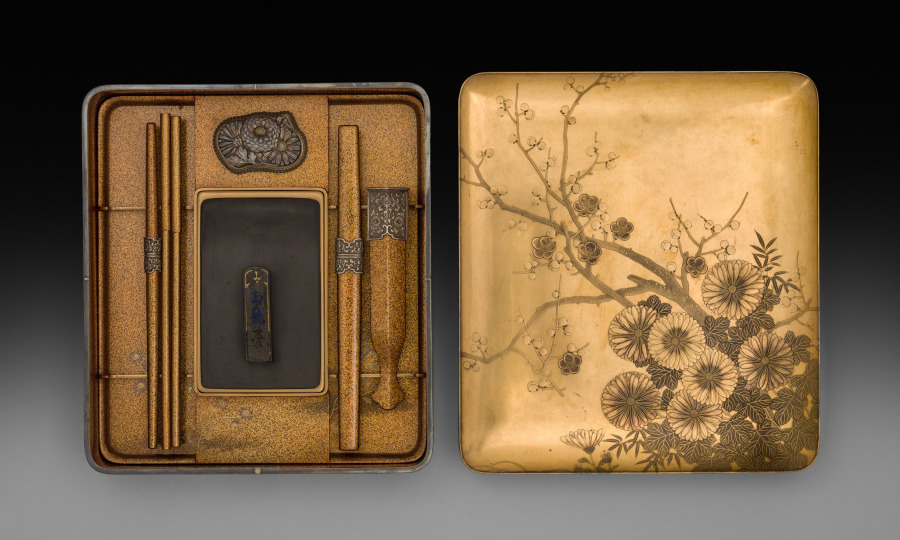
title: Writing Box (Suzuribako) with Chrysanthemum and Plum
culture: Japan, Meiji period (1868–1912)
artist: Sasaki Takayasu (Japanese, 1845–1929)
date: late 1800s-early 1900s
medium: Lacquer over wood with gold and silver sprinkled powder (maki-e)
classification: Lacquer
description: Both functional and elegant, this is a container for an ink stone, brushes, and ink from a set of writing tools that included a larger box for paper. Against a sleek gold lacquered ground, its artist has used restraint in sprinkled powder decoration (maki-e) to produce the design of cockscomb and harvested rice on the interior of the lid.